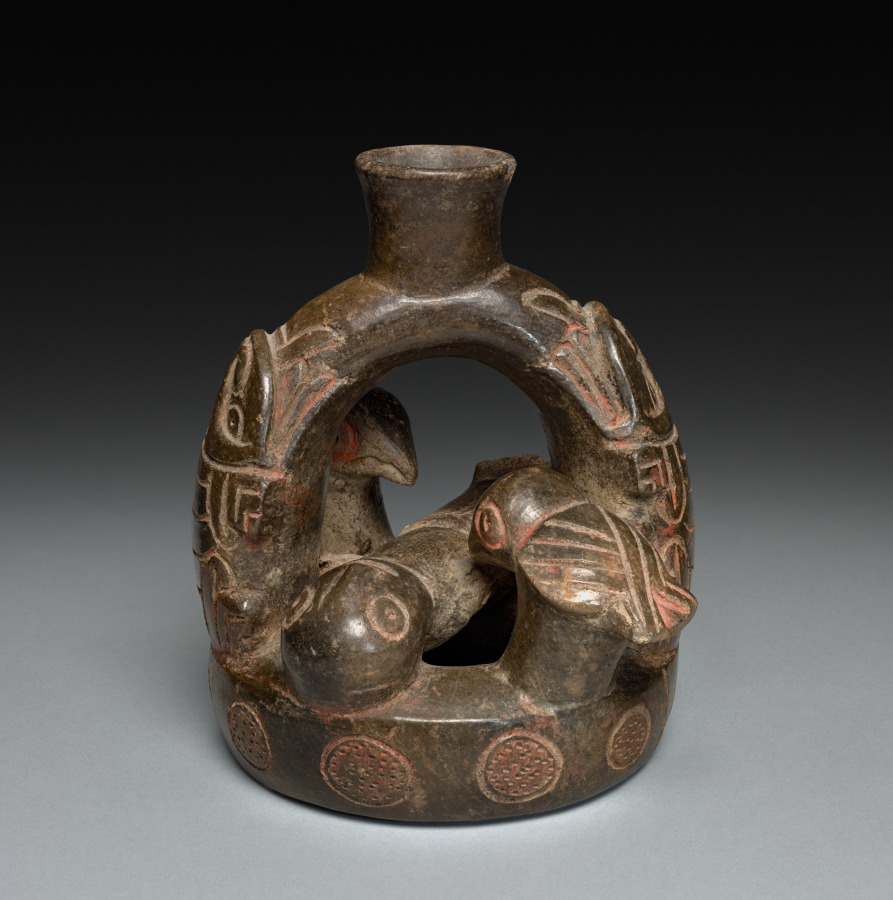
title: Vessel with Reclining Figure and Birds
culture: Andes, north coast, Cupisnique style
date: 2200–200 BCE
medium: Ceramic, pigment (cinnabar?)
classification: Ceramic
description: This ceramic vessel features a supine human being pecked by two birds that perch on the vessel’s doughnut-shaped chamber. The identity of the apparently mythical creature modeled in low relief on the sides of the stirrup-shaped spout is unknown. Little can be said about meaning beyond pointing out an obvious reference to death.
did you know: The stirrup-shaped form of the spout is common among Peruvian ceramics and unique to the ancient Americas.